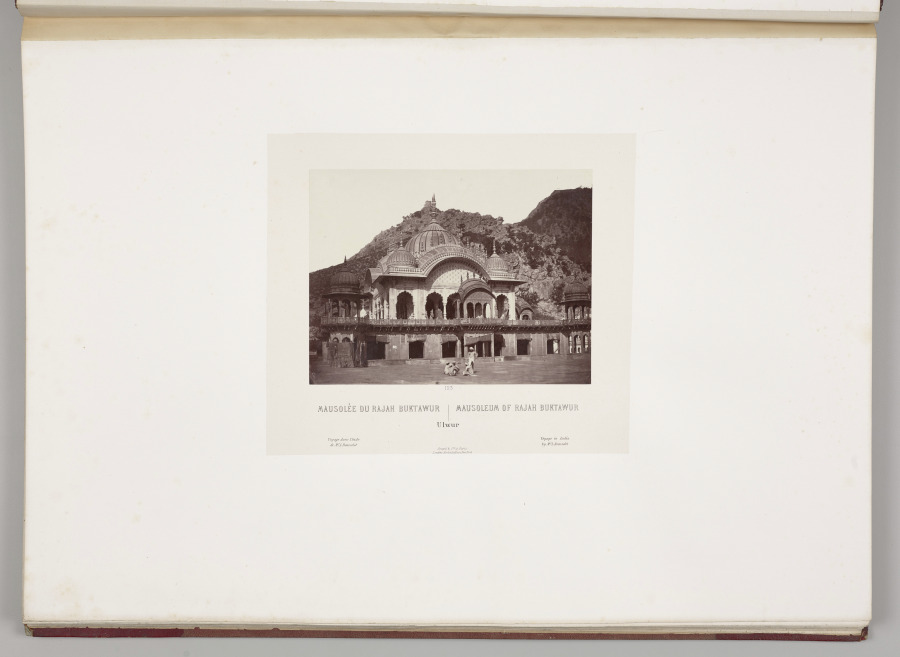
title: Mausoleum of Rajah Buktawur, Ulwur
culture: France, 19th century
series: India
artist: Louis-Théophile Marie Rousselet (French, 1845–1929)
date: 1865–68, published 1869–70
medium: Albumen print from glass plate negative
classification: Photograph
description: Concerned that his drawings did not do justice to the splendor of India’s monuments, Rousselet learned photography in India that year, a remarkable accomplishment. He proved to be a talented photographer with a sophisticated sense of composition. The scenes in this volume sweep across sites of Sultanate, Rajput, and Mughal power in northern India, from the sacred Hindu city of Varanasi on the Ganges River to Alwar in Rajasthan. Also included are several scenes of industry and portraits of Indian rulers.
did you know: Louis Rousselet described himself as a “scientific traveler” when he went to India alone at age 18 in 1863 and stayed into 1868.